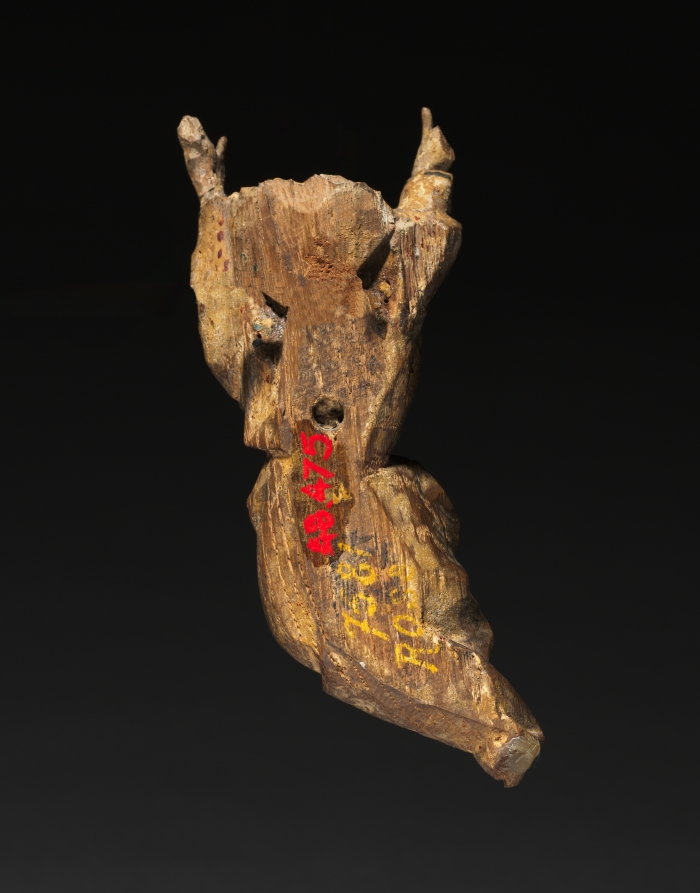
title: Angel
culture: South Netherlands, Brabant, 16th century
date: c. 1500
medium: oak with traces of gilding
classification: Sculpture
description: This lamenting angel probably comes from a Crucifixion scene at the center of a multi-figured altarpiece.